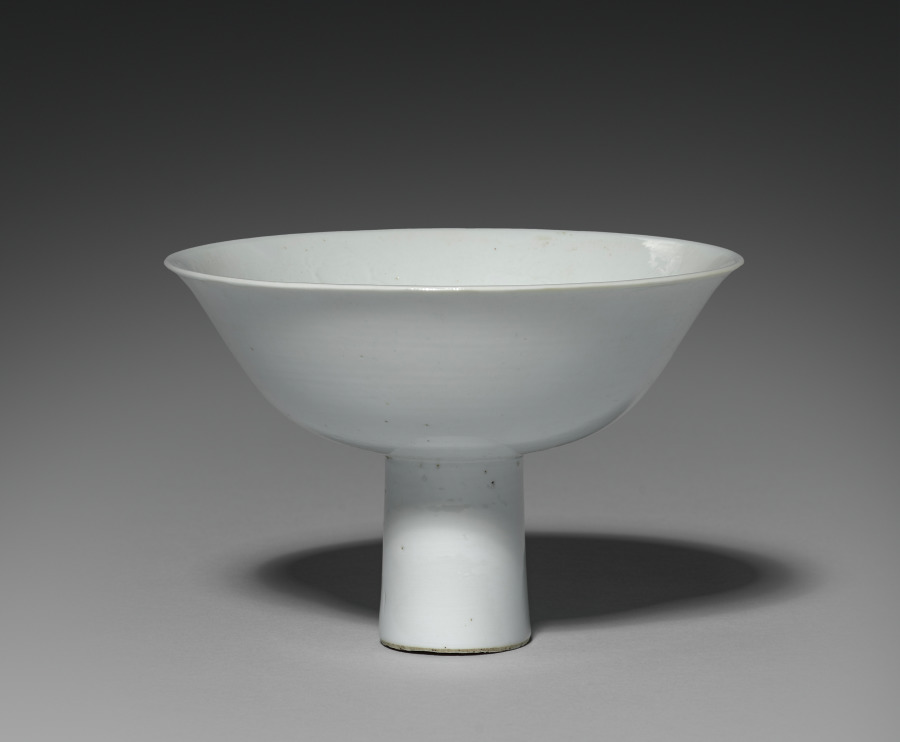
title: Stem Cup with Buddhist Emblems: Shufu Ware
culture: China, Jiangxi province, Yuan dynasty (1271-1368)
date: 1300s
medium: porcelain with molded decoration and white glaze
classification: Ceramic